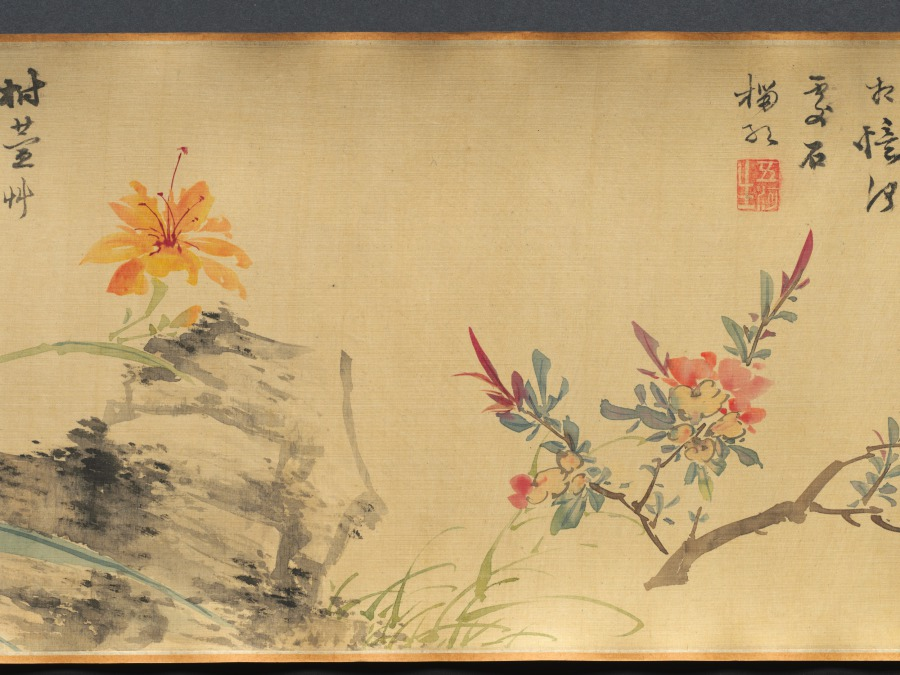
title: Flowers of Four Seasons, with Poems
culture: China, Ming dynasty (1368–1644)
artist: Wang Guxiang (Chinese, 1501–1568)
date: 1531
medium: handscroll; ink and light color on silk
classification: Painting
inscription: Artist's inscription, signature, and 15 seals. Ink Orchids. Sewn as pendants for the man of worth, swaying quiety, fragrance in the valley. [seal] Hsiao-chu ts'un Peony. Wiping his face, the young gentleman Ho [Ho Yen of Wei, Three Kingdoms] appears to have been powdered. His previous life was the perfume-stealing Han Shou [of Chin, 265–419 CE], the fragrance still lingers. [seal] Ts'un-wu chai. Flowering Crab Apple, New Bamboo. Shao-lin [Du Fu, 712–770] had to put down his brush. [Flowering Crab Apple]. Yü-k'o [Wen T'ung, d. 1079) in vain wrote poems about [Bamboo]. [seal] Yu-shih. Lotus Flowers. When she turns her head, half-hidden by a fan, and casts a glance, all the beautiful women become colorless. [seal] K'ang yüeh huai. Loquat. Ripeness in summer. [seal] Lu-chih. Pomegranate Flower. Whenever I remember you I will send my thoughts, but where have you gone--the [skirt] of pomegranate red? [seal] Wu-ho Sheng. Day Lily. Plant the day lily to forget sorrow. [seal] Yu-shih. Chrysanthemum. The untrammelled joy at the eastern fence. [seal] Lu-chih. Begonia. Comparing it to the beauties of Spring, and spreading them out as trimming for the stone steps. [seal] Yu-shih. Hibiscus. In recent years I have always enjoyed looking at flowers; instead of dark red I preferred pink ones. [seal] Jen-sheng i-lou. Narcissus, Camellia. The jade girdle left behind at Lo River. [Narcissus]. The precious pearls glitter before Spring. [Camellia]. [seal] Lu-chih. Heavenly Bamboo (Nandina domestica). A single branch in the wintry season. [seal] K'ang yüeh huai. Plum. Fragrant snow in the Lo-fou Mountains. [seal] Ts'un-wu chai. In the eleventh lunar month of the hsin-mao year of the Jiaqing era [1531], [I] imitated the boneless style of Yüan masters in sketching from life. Guxiang [seals] Yu-shih; Lu-chih. Translated by Wai-kam Ho/Lingyun Shih Liu (1980)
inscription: 2 colophons and 23 additional seals: 1 colophon dated 1632, and 2 seals of Li Jih-hua [Li Rihua] 李日華 (1565–1635); 1 colophon and 2 seals of Xiang Shengmo 項聖謨 (1597–1658); 3 seals of Liang Qingbiao 梁清標 (1620–1691); 6 seals of the Jiaqing 嘉慶 emperor (r. 1796–1820); 9 seals of Ch'eng Ch'i [Cheng Qi] 程琦 (1911–1988)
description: In this painting, flowers are loosely arranged by the seasons: narcissus and peony represent early spring; yellow loquat and lotus, summer; chrysanthemum, autumn; and the plum and evergreen bamboo, winter. The artist added to each flower a poetic line of calligraphy associating each plant with a historic or legendary figure. For example, the chrysanthemum, along with the line “The untrammeled joy at the eastern fence,” refers to the poet Tao Yuanming (died AD 427) who enjoyed chrysanthemums at the eastern fence in his garden. The scroll illustrates Wang Guxiang’s mastery of free brushwork, combining light monochrome ink with transparent colors. In his inscription, Wang says he used the “boneless” style without outlines as developed during the Yuan dynasty (1279–1368). Wang was a native of Changzhou, a city in southeast China known for its rich flora and fauna, and flower-and-bird painting tradition.